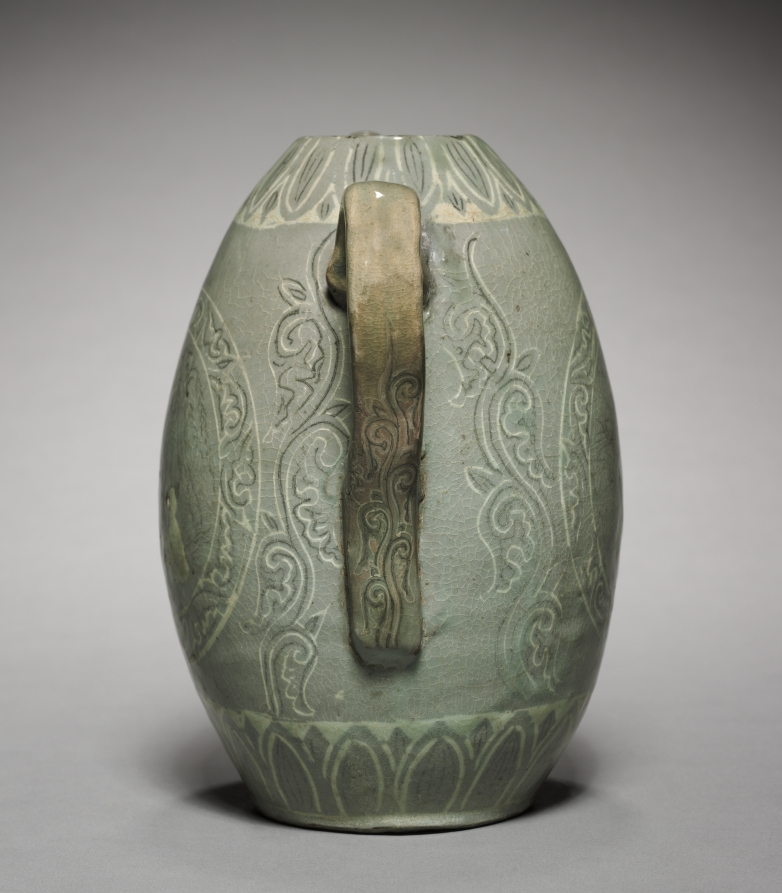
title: Pitcher with Inlaid Figure and Willow Design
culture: Korea, Goryeo dynasty (918–1392)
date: 1200s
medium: celadon ware with inlaid white and black slip decoration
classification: Ceramic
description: Representations of the elite’s elegant gatherings also appear on craft art designs, particularly depictions of the four accomplishments celebrated as cultivated pastimes by the scholar-literati elite—that is, playing stringed instruments and chess, and practicing calligraphy and painting. The image on this rare Korean inlaid celadon of two figures sitting together under a tree is comparable to renderings featuring the accomplishment motif of playing chess, or baduk in Korean.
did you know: As one of the oldest board games invented in China, this East Asian chess is still played in international competition venues.